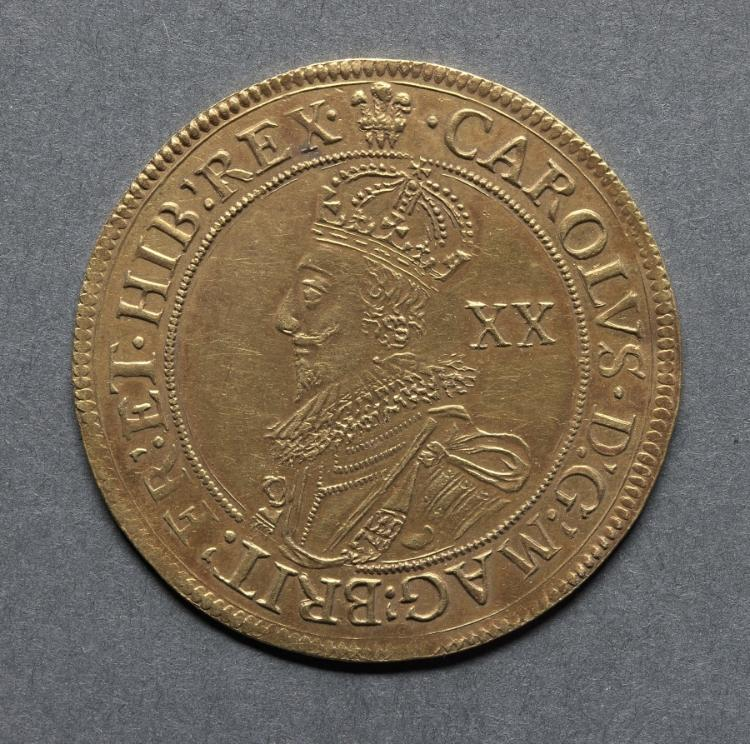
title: Unite: Charles I (obverse)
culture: England, Charles I, 1625-1649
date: 1630–1631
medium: gold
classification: Coins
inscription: CAROLUS DG MAG BRIT FR ET HIB REX, XX